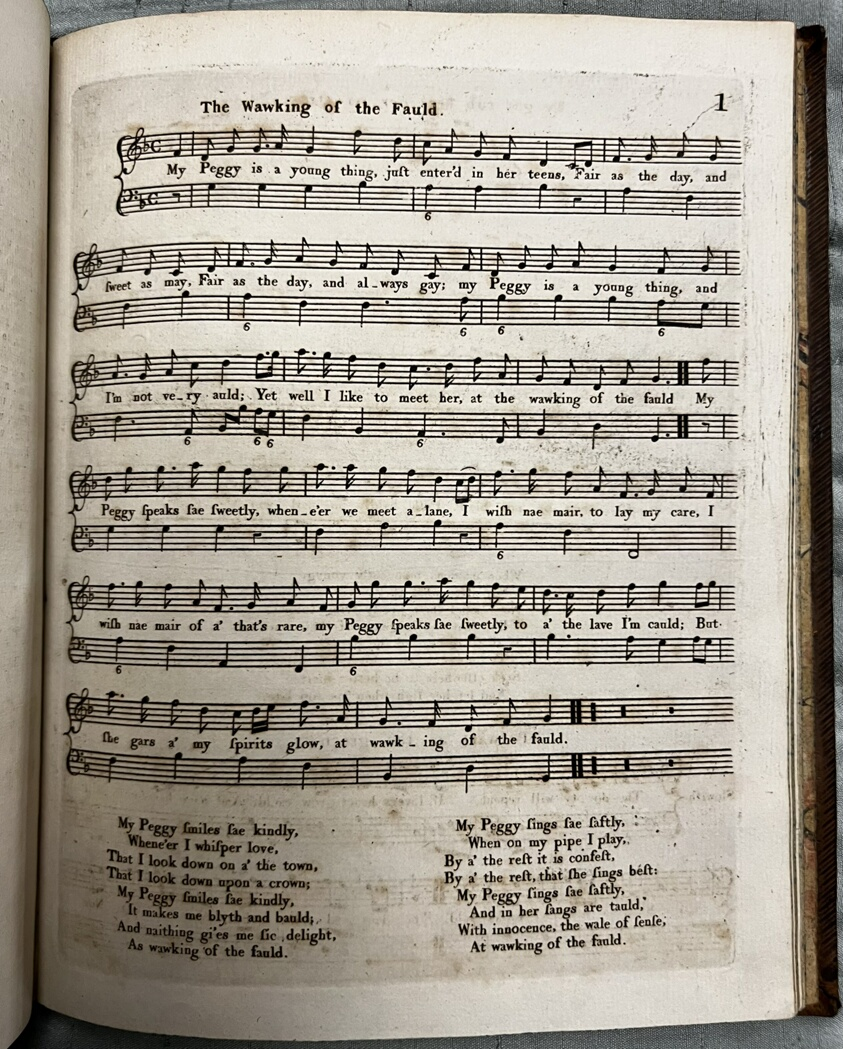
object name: Book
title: The Gentle Shepherd: a Pastoral Comedy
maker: David Allan (Scottish, 1744-1796); written by Allan Ramsay (Scottish, 1686-1758); printed by A. Foulis (Scotland, 18th century)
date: 1788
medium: Book with illustrations in etching and aquatint in black on cream laid paper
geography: Scotland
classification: book; paper; prints and drawing